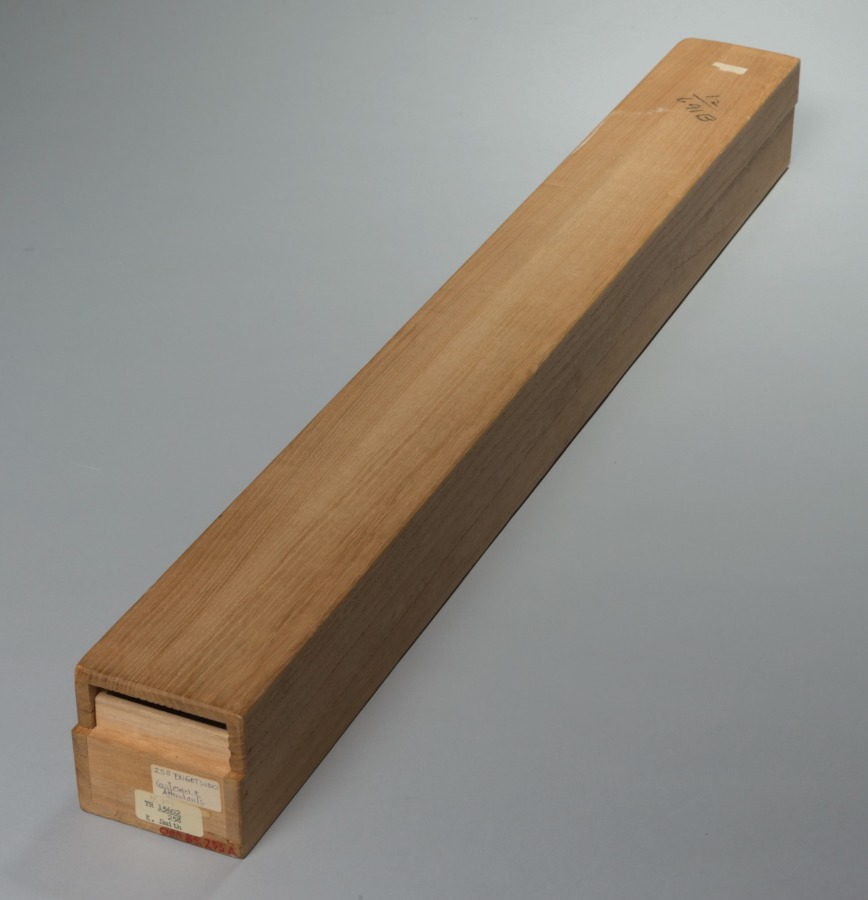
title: Courtesan and Attendants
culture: Japan, Edo period (1615–1868)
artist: attributed to Engetsudō (Japanese)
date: c. 1748–51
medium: hanging scroll; ink and color on paper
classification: Painting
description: The courtesan wears a pair of tall, lacquered wooden clogs and heavy robes, indicating it is winter. The elaborate span of her tortoiseshell comb in her fashionable coiffure enhances her glamorous appearance. Her blue-and-white striped obi is tied in a loose bow in front, typical for her profession. The round, stylized cherry blossom crest of her "house" (brothel), partially visible on her shoulder just above the shawl, also appears on the robes of her two attendants (kamuro). The attendants hold shuttlecocks, used in a game associated with New Year celebrations. One girl stares out at the viewer; the other looks back. The frontal view of the attendant’s face is somewhat rare in ukiyo-e painting and prints.